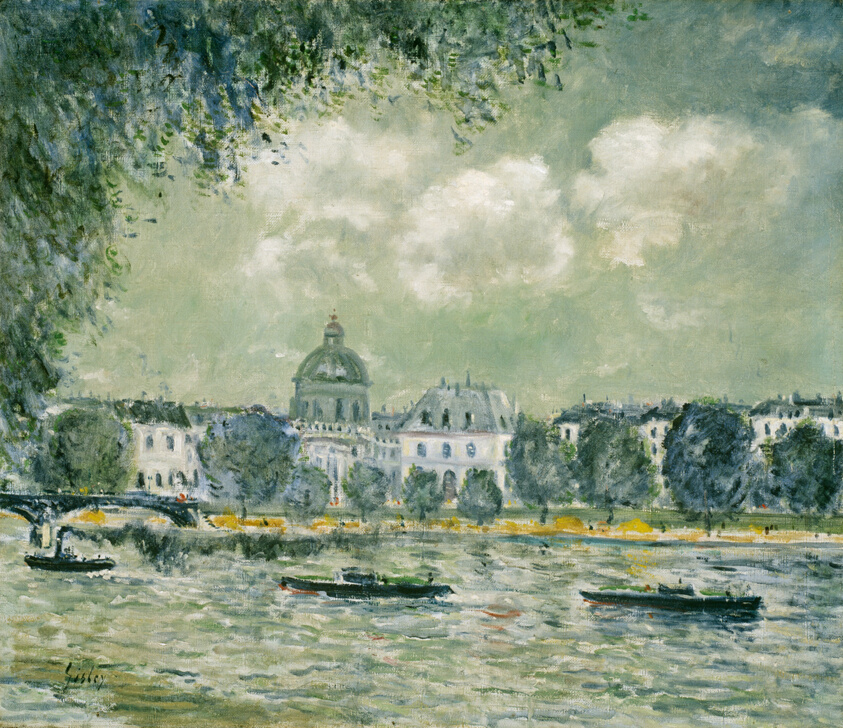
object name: Painting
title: Landscape along the Seine with the Institut de France and the Pont des Arts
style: Impressionism, nineteenth century, 19th century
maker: Alfred Sisley (French, 1839–1899)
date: c. 1875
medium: Oil on canvas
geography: France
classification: oil on canvas; paint; oil paintings (visual works); french; painting; european painting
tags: landscape, building, buildings, boats, boatman, bridge, steam, smoke, trees, sky, road, paths, nature, France, clouds, landscapes, weather/seasons, urban life, water